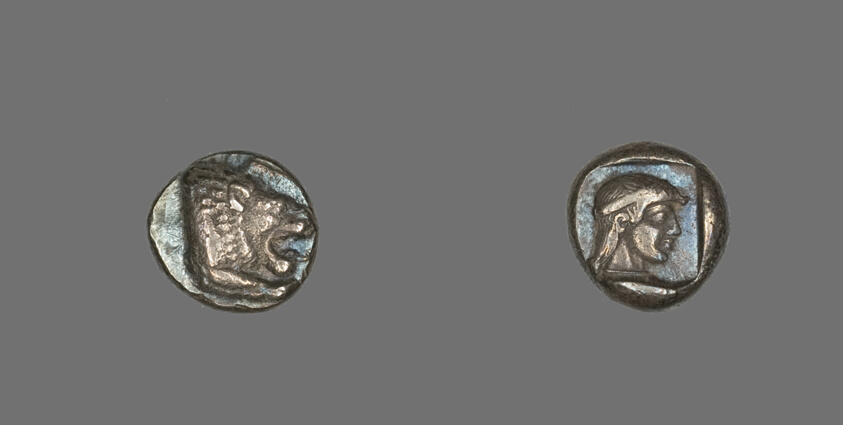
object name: Coin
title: Drachm (Coin) Depicting Lion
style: archaic (greek), greek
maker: Greek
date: 500-480 BCE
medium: Silver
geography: Cnidus Nova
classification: coin; ancient art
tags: lions